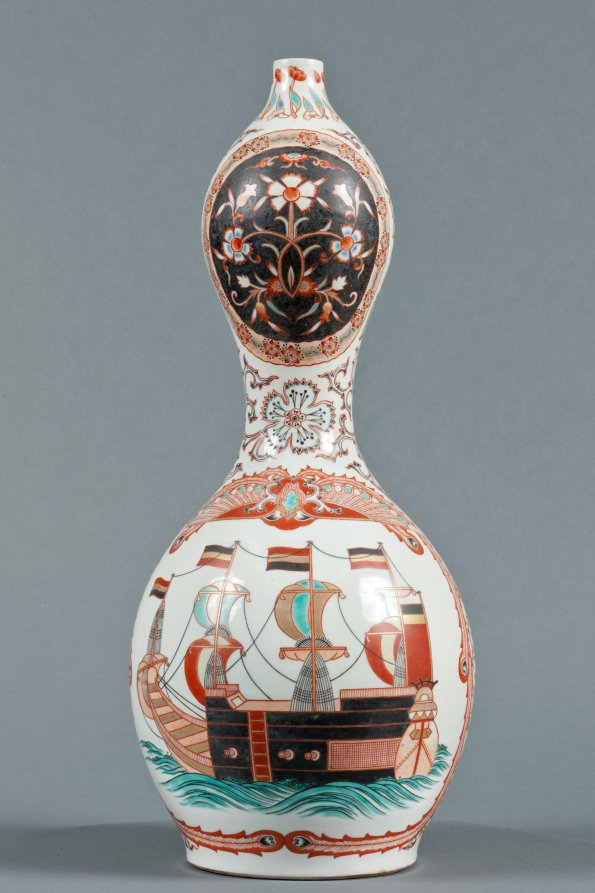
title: Bottle with Western Ships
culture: Japan, Edo period (1615–1868)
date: c. 1800–1868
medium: Porcelain with decoration in colored enamels and underglaze blue, overglaze enamels, and gold (Hizen ware, Arita type)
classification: Ceramic